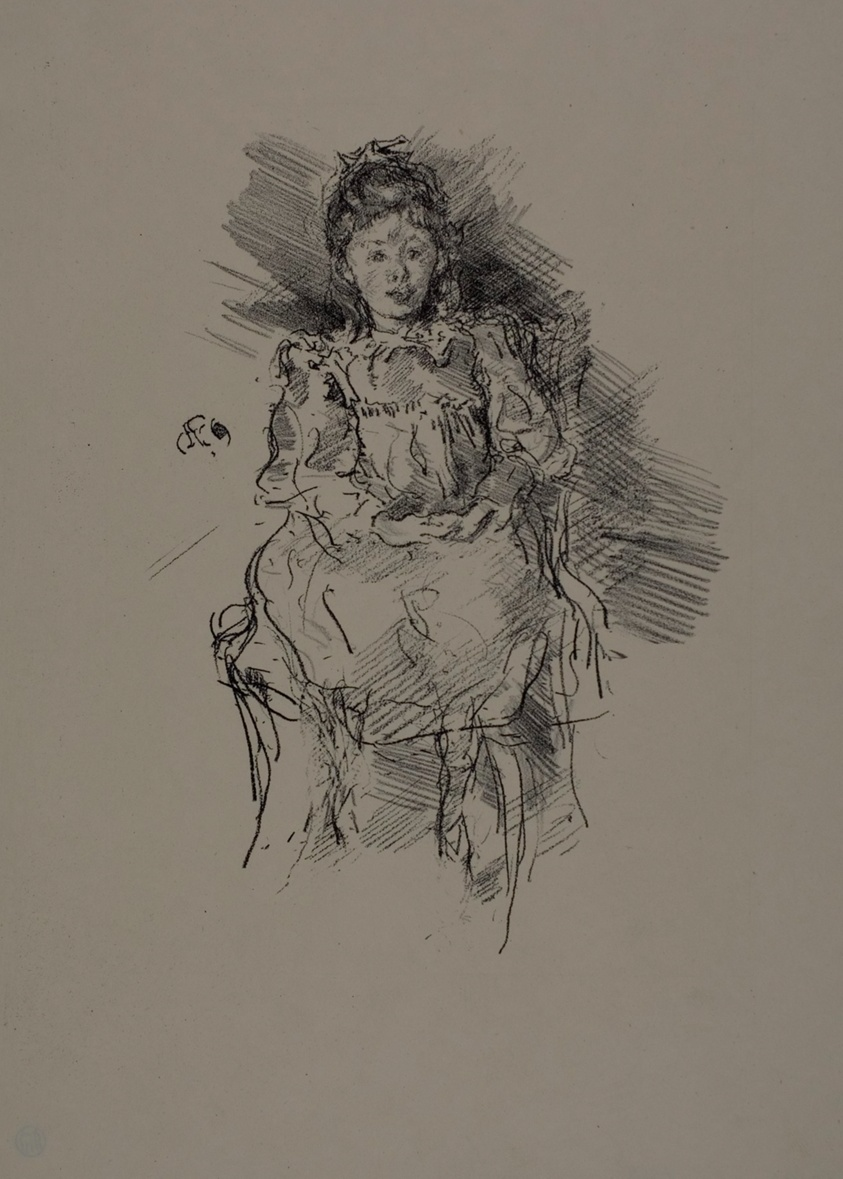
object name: Print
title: Little Dorothy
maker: James McNeill Whistler (American, 1834-1903)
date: 1896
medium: Transfer lithograph in black on ivory wove proofing paper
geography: United States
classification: transfer lithograph; lithograph; print; prints and drawing; paper